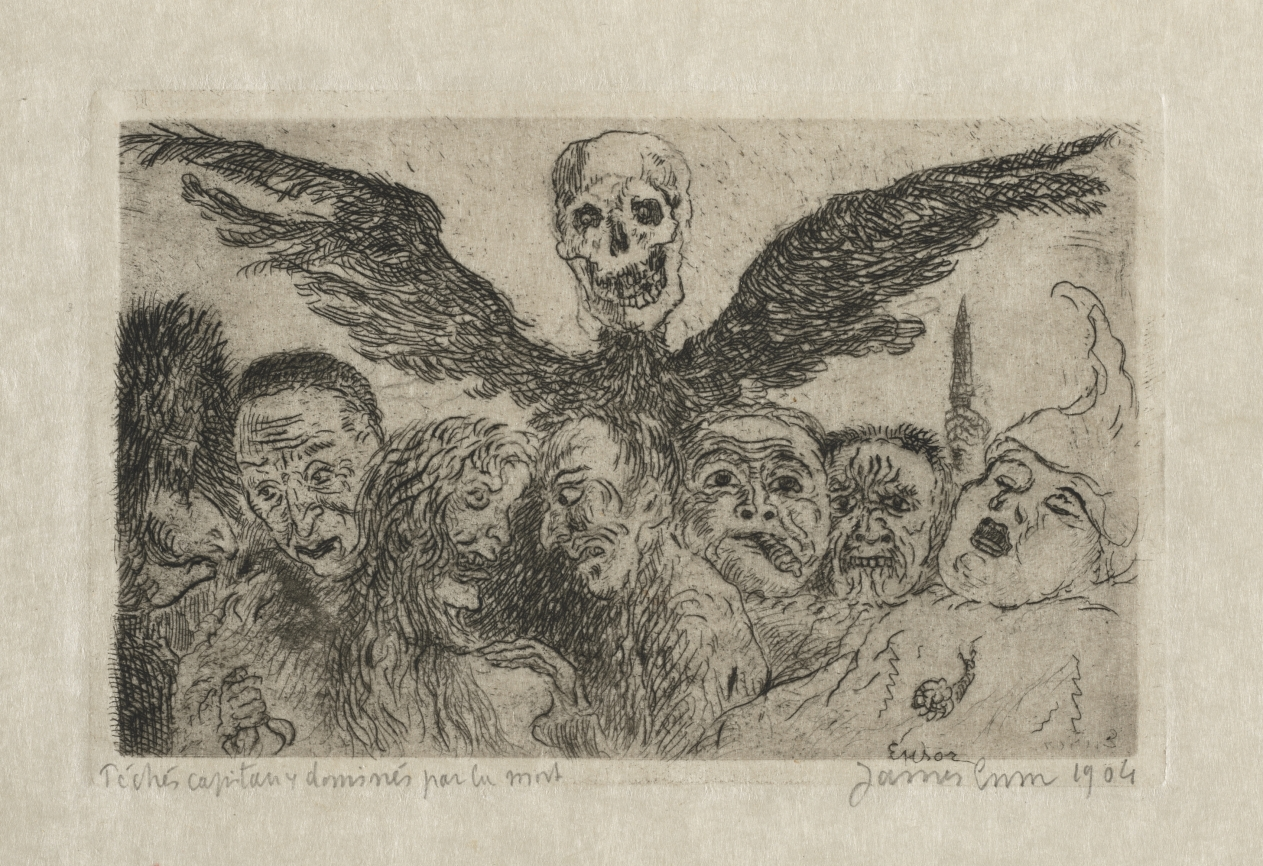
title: The Seven Deadly Sins: Title Page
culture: Belgium, 19th-20th century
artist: James Ensor (Belgian, 1860–1949)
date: 1902–1904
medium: etching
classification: Print